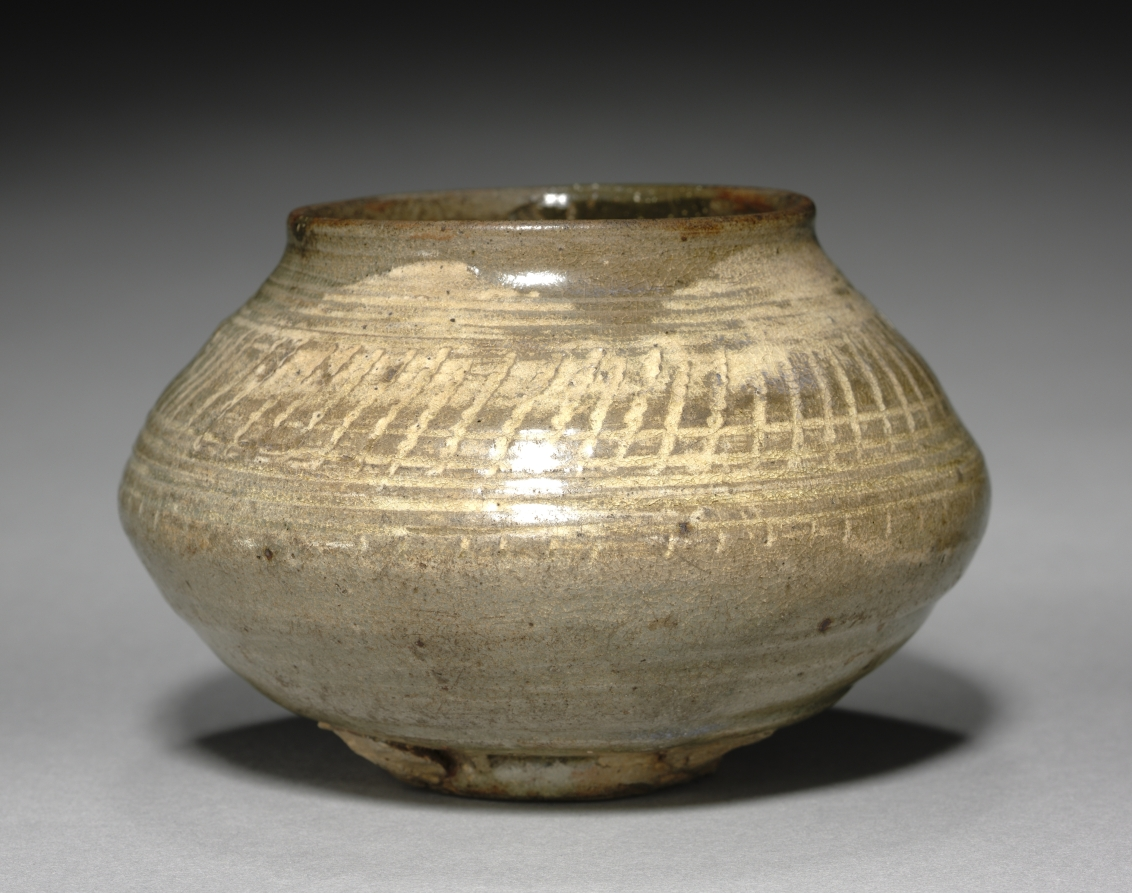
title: Jar with Stamped Decoration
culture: Korea, Joseon dynasty (1392–1910)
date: 1400s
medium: stoneware with incised design, white slip, and overglaze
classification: Ceramic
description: This small jar may have been used as a container for powdered tea among Japanese tea drinkers. Possibly produced in one of the kilns established by the trading office (Waegwan) in Busan, southern Gyeongsang province, it was sold to Japanese tea bowl collectors. According to a historical record dated to 1641, one trading boat shipped more than 14,000 tea bowls to Japan.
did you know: This little jar was part of the gift donated by John L. Severance (1863–1936). He and his father Louis H. Severance (1838–1913) collected Korean ceramics of the Goryeo dynasty (918–1392) from a number of pioneering medical missionaries as a way to foster their activities in Korea, and later donated them to the Cleveland Museum of Art.